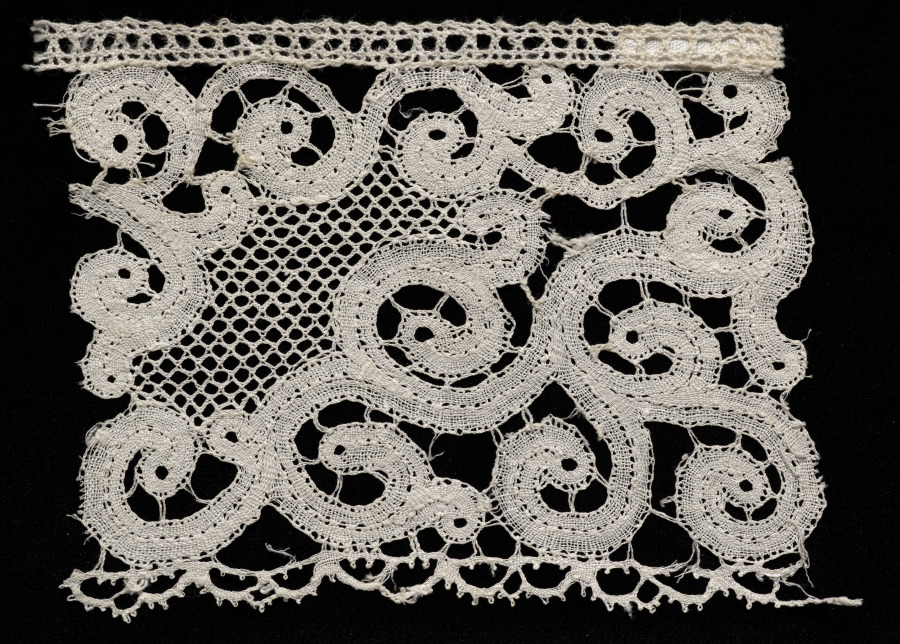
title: Lace Edging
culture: Italy, Milan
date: 1700s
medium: Linen: bobbin lace (bride ground)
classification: Lace